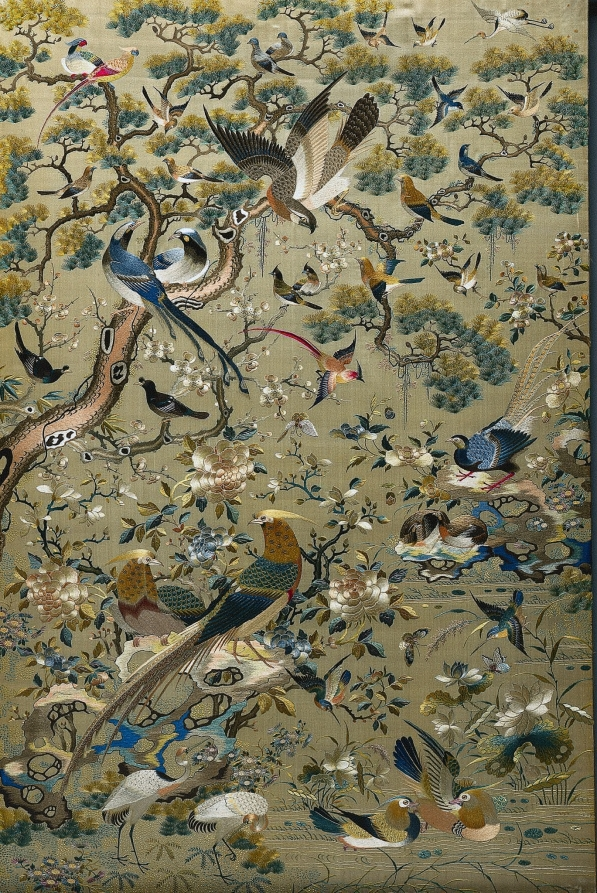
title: A Myriad of Birds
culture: China, Qing dynasty (1644–1911)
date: 1700s–1800s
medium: silk: satin weave with polychrome silk embroidery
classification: Embroidery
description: This embroidered panel, made with extremely fine silk threads, presents a lavishly detailed composition filled with fortuitous imagery. Pairs of birds, including mandarin ducks, peacocks, cranes, swallows, and pheasants, move among flowering trees, ornamental rocks, and aquatic plants, symbolizing harmony, prosperity, and longevity. Cranes stand for longevity, while a pair of mandarin ducks convey wishes for a harmonious marriage. Inspired by the decorative bird-and-flower paintings of the artist Lü Ji, the work prioritizes symbolism over spatial logic. With vibrant colors, meticulous stitching, and fortuitous meaning, the embroidery exemplifies the technical brilliance of Qing dynasty textile art, rivaling the quality of imperial production.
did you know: This magnificent textile, probably executed by a woman, demonstrates the tradition of making embroidered pictures in imitation of paintings.